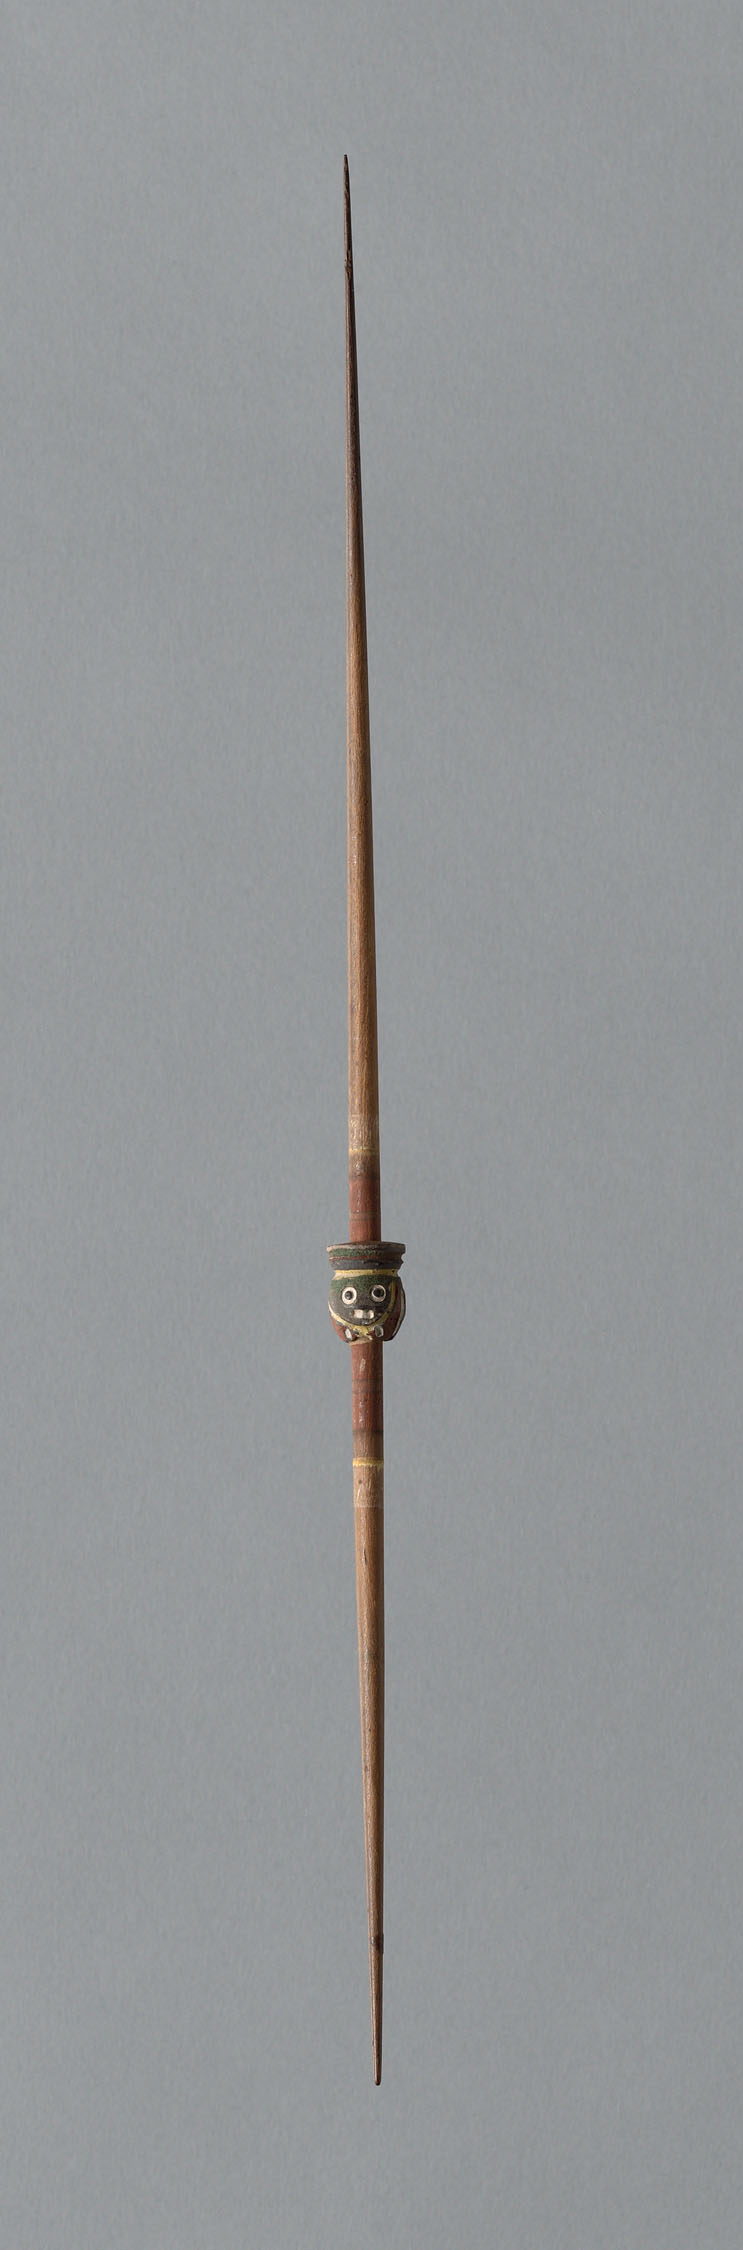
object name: non-art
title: Wooden Spindle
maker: Peru, Possibly central coast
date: 1000/1476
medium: Wood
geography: Peru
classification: spindles (textile working equipment); textile working equipment; accessories (object genre); textile